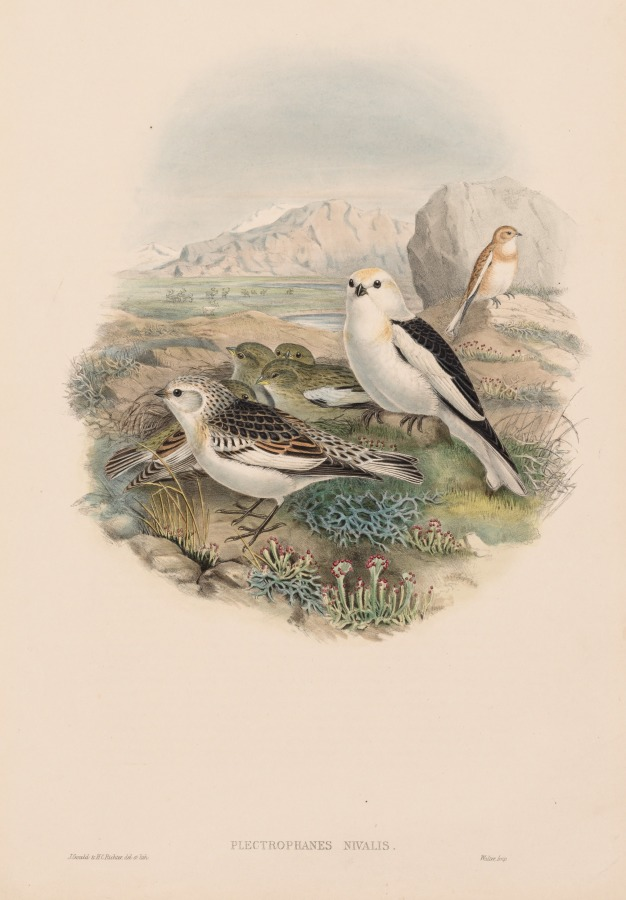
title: Plectrophanes Nivalis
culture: England, 19th century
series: The Birds of Great Britain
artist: John Gould (British, 1804–1881)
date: 1873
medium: lithograph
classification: Print